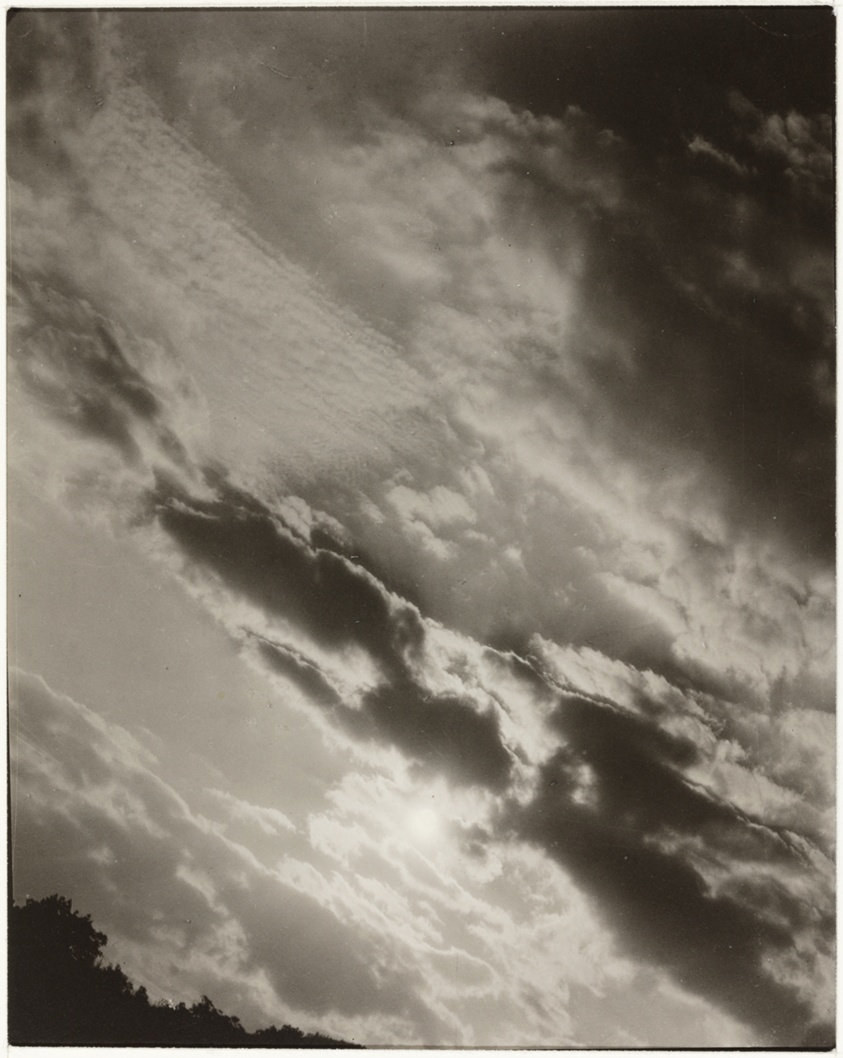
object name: Photograph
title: Equivalent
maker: Alfred Stieglitz (American, 1864–1946)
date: 1923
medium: Gelatin silver print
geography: United States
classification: gelatin silver (developing-out-paper) pr; photographic process; photography; photograph